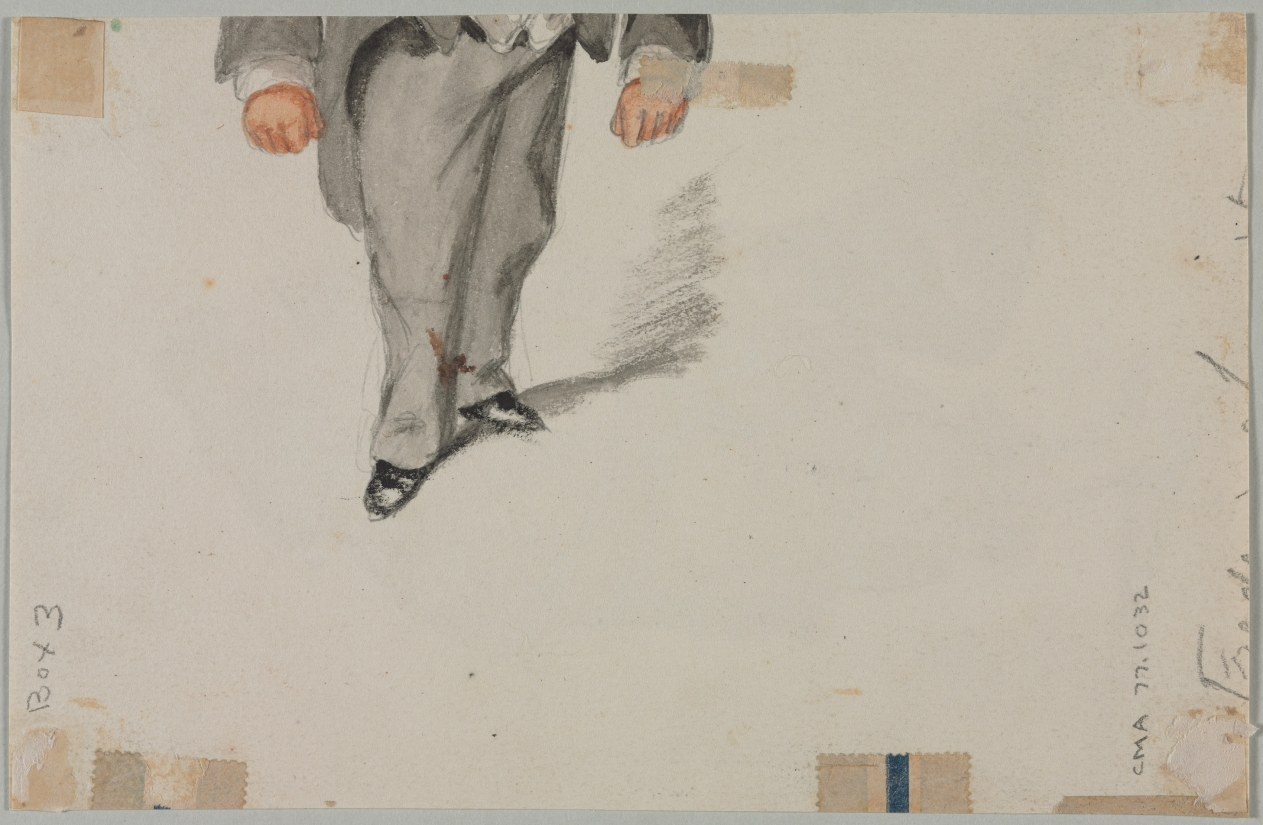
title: Man with a Large Hat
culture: France, 19th century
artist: Paul Gavarni (French, 1804–1866)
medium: pencil with watercolor on paper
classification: Drawing